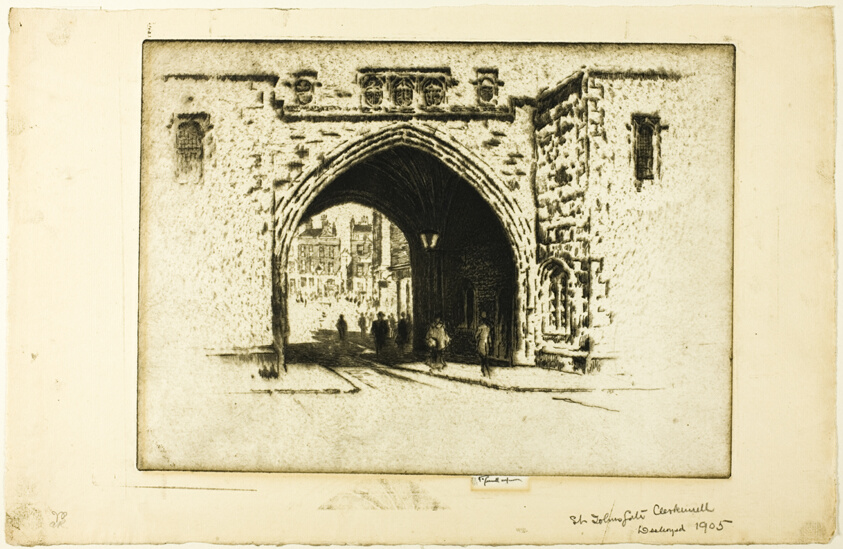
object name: Print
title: St. John's Gate, Clerkenwell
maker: Joseph Pennell (American, 1857-1926)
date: 1903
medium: Etching on ivory laid paper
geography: United States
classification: etching; prints and drawing; print